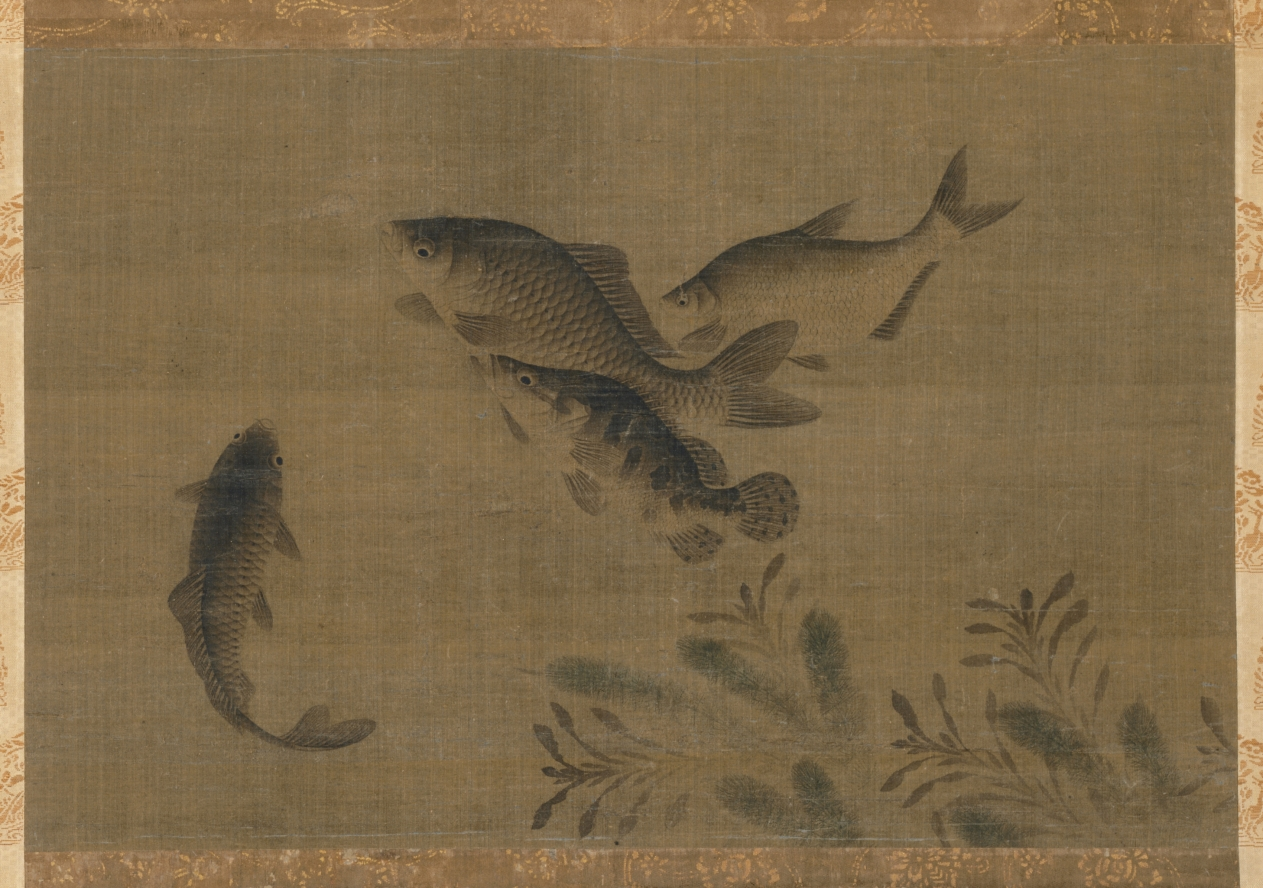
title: Fish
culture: China, Ming dynasty (1368–1644)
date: c. 1400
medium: hanging scroll, ink and slight color on silk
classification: Painting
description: Four fish of various sizes are swimming among aquatic plants. Like in other paintings, the existence of water is suggested in the harmonious movement of the fish and plants. In Chinese, the word for fish (yu) is a homophone for “abundance” and thus the motif has an auspicious connotation. The painter uses the so-called boneless technique without outlines to shade and texture the bodies of the fish. The smooth transition from dark shades on their backs to their white bellies and the thin transparent fins and tails in light washes accentuated by gills and scales are all executed without contour lines.